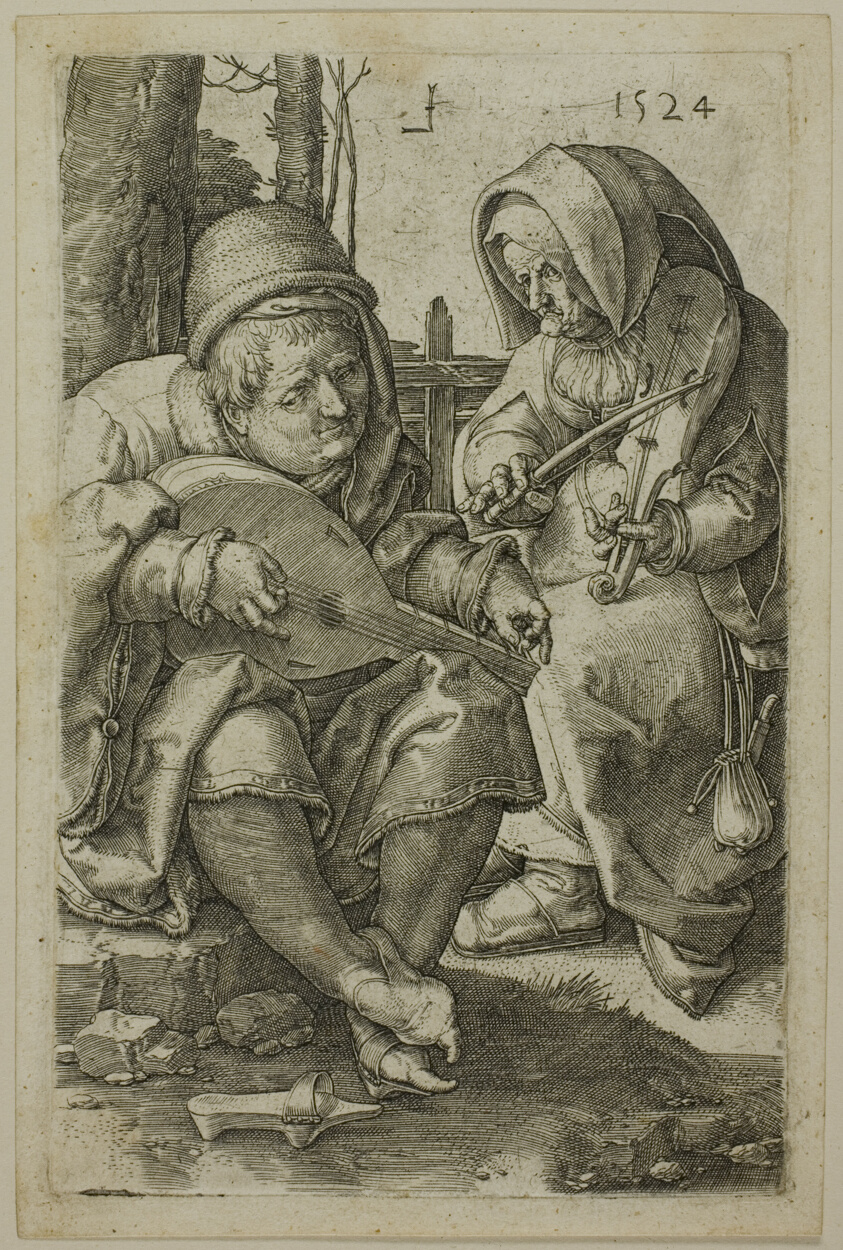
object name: Print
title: The Musicians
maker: Lucas van Leyden (Netherlandish, c. 1494-1533)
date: 1524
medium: Engraving in black on cream laid paper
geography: Netherlands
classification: engraving; print; prints and drawing